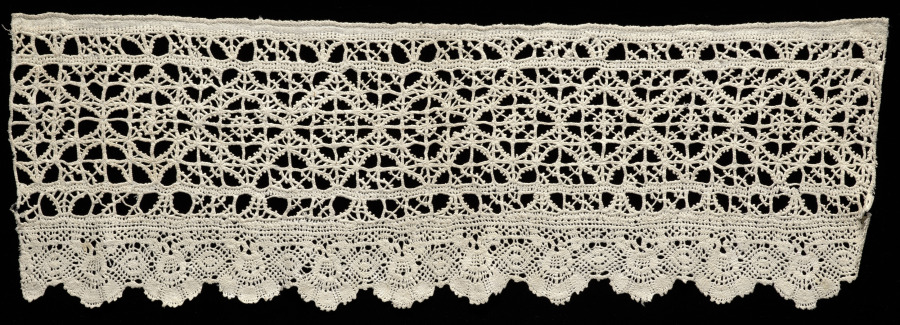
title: Lace Band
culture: Italy, 1800s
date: 1800s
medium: Linen: needle lace (Reticella) and bobbin lace edging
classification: Lace